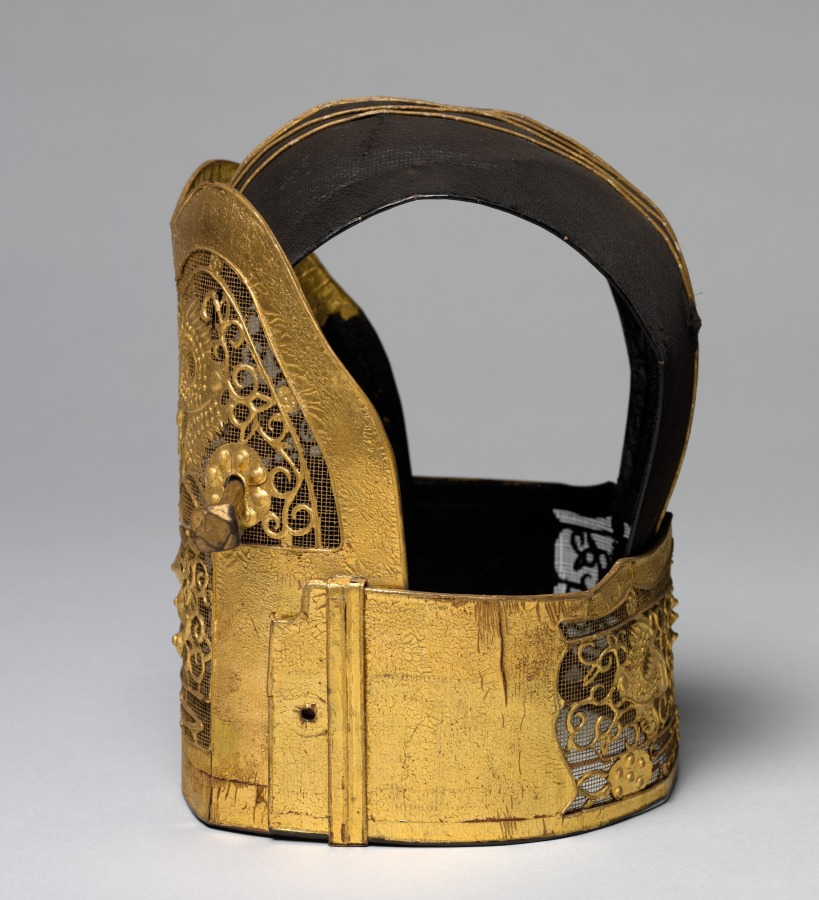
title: Crown for the Royal Ceremonial Costume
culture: Korea, Joseon dynasty (1392–1910)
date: late 1800s–early 1900s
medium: gilded paper, metal wire, and black silk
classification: Garment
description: This is a set of royal ceremonial robe and accessories worn by a high-ranking court official for attending special state ceremonies. The set consists of an inner coat, an outer coat, a skirt, a back apron, a crown, a pair of jade tassels, a tablet, and a belt.